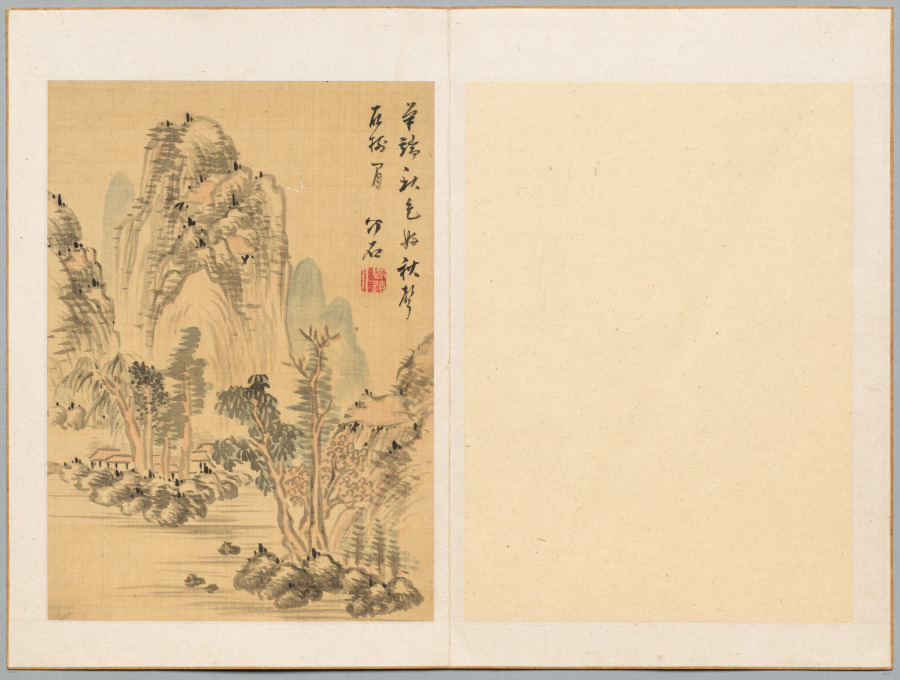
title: Colors and Sound of Autumn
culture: Japan, Edo period (1615–1868)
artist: Noro Kaiseki (Japanese, 1747–1828)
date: late 1700s-early 1800s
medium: leaf from a pair of folding albums; ink and light color on paper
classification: Portfolio